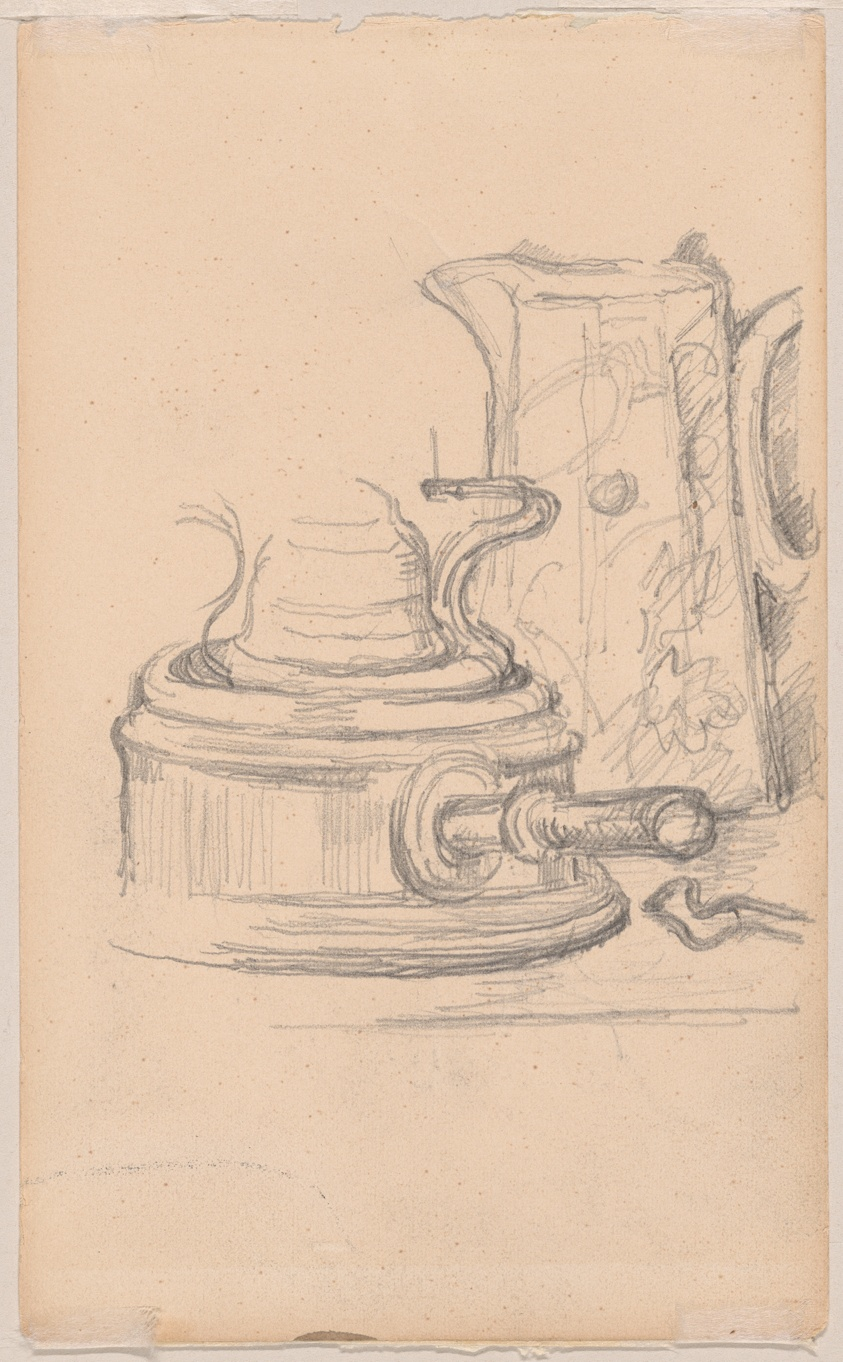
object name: Drawing and Watercolor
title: Milk Jug and Spirit Stove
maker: Paul Cézanne; French, 1839-1906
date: 1879–82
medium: Graphite on ivory wove paper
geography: France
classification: graphite; drawings (visual works); prints and drawing